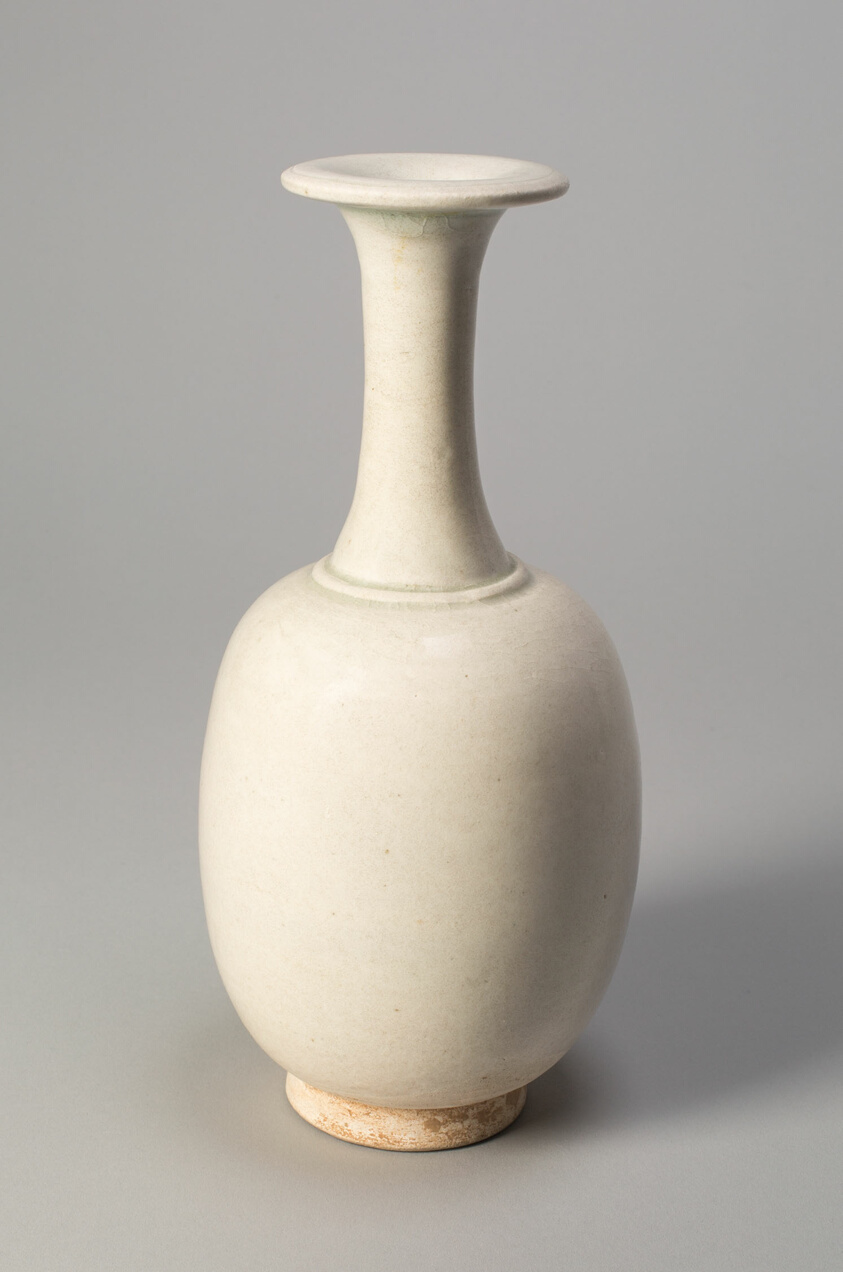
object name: Vessel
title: Bottle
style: Chinese (culture or style)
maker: China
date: Tang dynasty (A.D. 618–907), 8th century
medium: Stoneware with ivory glaze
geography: China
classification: stoneware; asian art; ceramics; vessel